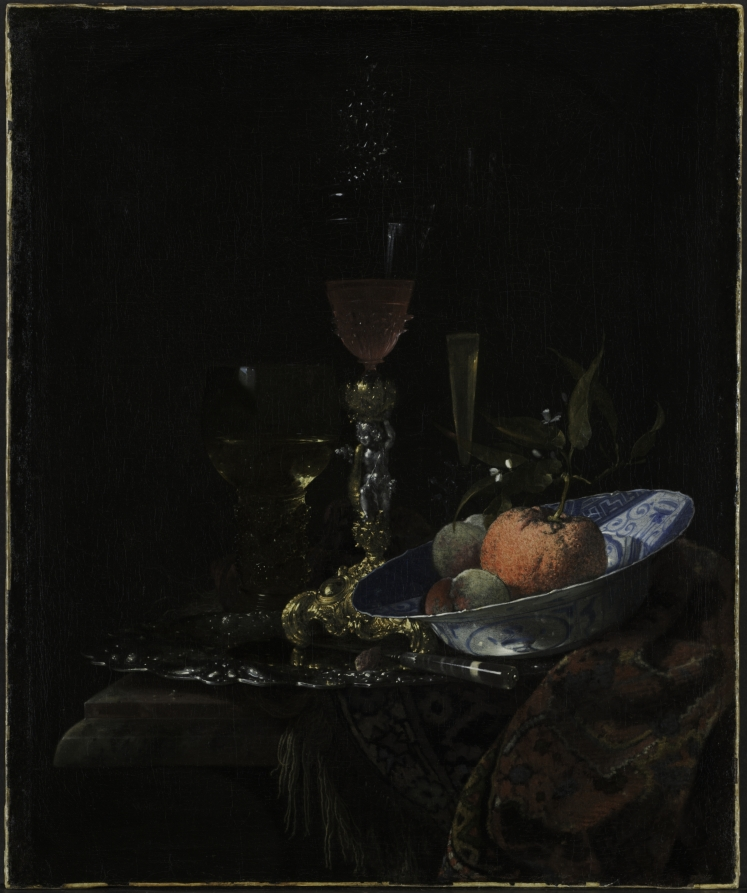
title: Wineglass and a Bowl of Fruit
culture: Netherlands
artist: Willem Kalf (Dutch, 1619–1693)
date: 1663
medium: oil on canvas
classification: Painting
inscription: Signed and dated lower left: "W. KALF 1663"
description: Priceless objects crowd the corner of a stone table in Kalf's composition. Pieces like the silver platter, delicate glasswares, thick rumpled carpet, and a Chinese porcelain bowl with peaches and an orange not only represented the great wealth and global reach of the Dutch trading empire, but were also a way for the artist to demonstrate his skill in recreating various surface textures. Kalf used different kinds of highlights to render reflections—quick dots, lines, and dabs of paint—creating sparkling, twinkling light effects that subtly distinguish objects from the surrounding shadows. In 1797, the German poet Johann van Goethe wrote that Kalf's paintings lead to understanding "in what sense art is superior to nature and what the spirit of man imparts to objects when it views them with creative eyes. . . . if I had to choose between the golden vessels or the picture . . . I would choose the picture."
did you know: Willem Kalf was the most accomplished proponent of the pronkstilleven, a Dutch term meaning "ostentatious still life."